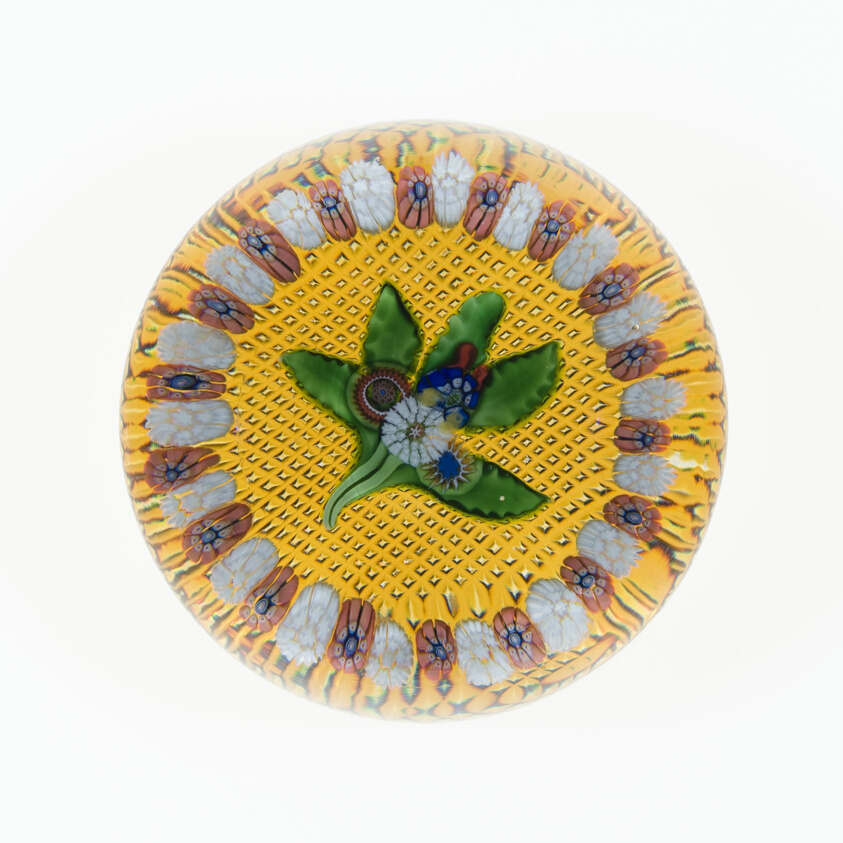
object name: Glass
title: Paperweight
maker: Saint-Louis Glassworks (Cristalleries de Saint-Louis); Lorraine, France, founded 1586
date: c. 1848–55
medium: Glass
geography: Saint-Louis-lès-Bitche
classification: paperweight; lampwork; european decorative arts; glass